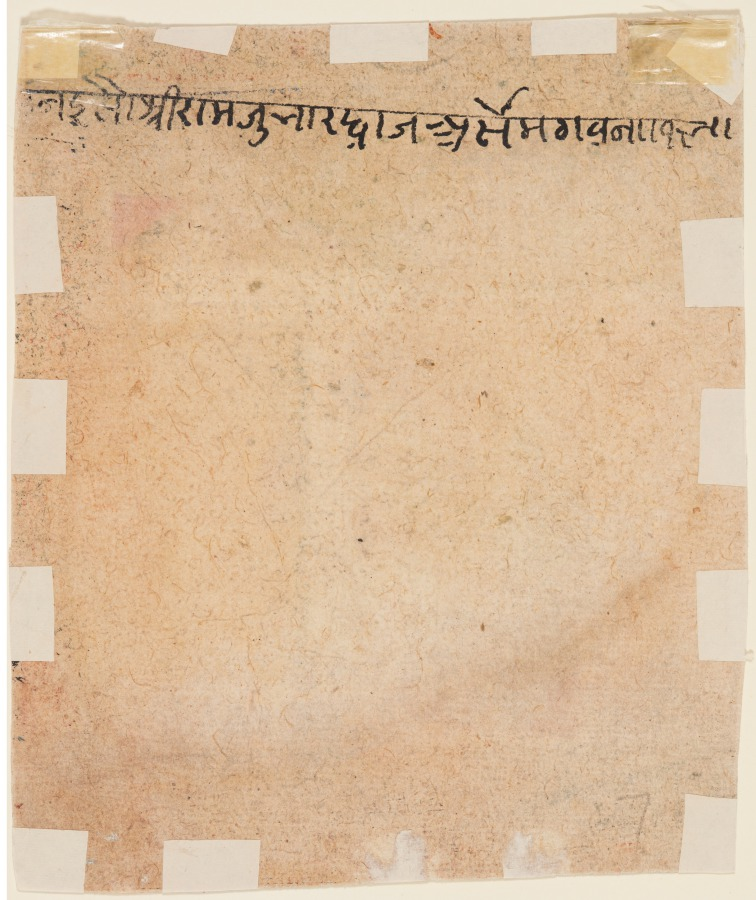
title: Rama, Sita, and Lakshmana visit the hermitage of the sage Bharadvaja at Prayaga, from Chapter 48 of the Ayodhya Kanda (Book of Ayodhya) of a Ramayana (Rama’s Journey)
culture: Central India, Malwa Region, Madhya Pradesh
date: c. 1650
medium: gum tempera, ink, and gold on paper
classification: Painting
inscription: [[verso]] nai sau śrī rāma ju bhārad vaja arsema gavanā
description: In a scene from their exile in the forest, the royal party arrives at the hermitage of a sage who greets him with folded hands. The blue Rama, his wife Sita, and his brother Lakshmana bow slightly in respect to the sage. The hermitage appears luxurious, with floral ornament inlaid in marble, bottles in niches, and an entrance similar to Mughal viewing windows.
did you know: Prayaga is the sacred site where the Ganges, Yamuna, and Sarasvati Rivers converge, formerly known as Allahabad.